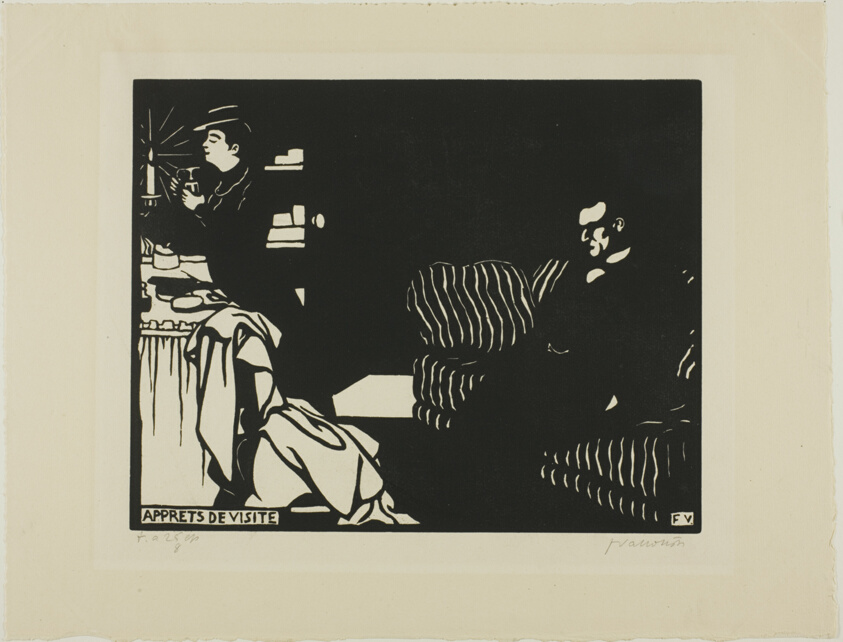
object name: Print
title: Getting Ready for a Visit, plate eight from Intimacies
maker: Félix Edouard Vallotton (French, born Switzerland, 1865-1925); published by La Revue blanche (French, 19th-20th century)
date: 1898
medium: Woodcut in black on cream wove paper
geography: France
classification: woodcut; print; prints and drawing